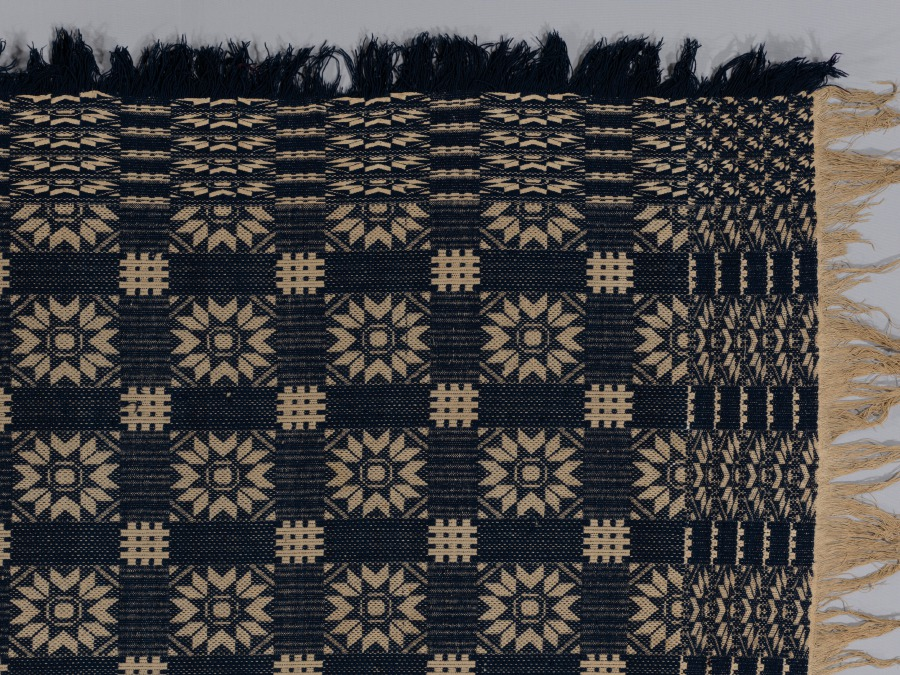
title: Coverlet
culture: America, Connecticut ?, 19th century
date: 19th century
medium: cotton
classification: Textile